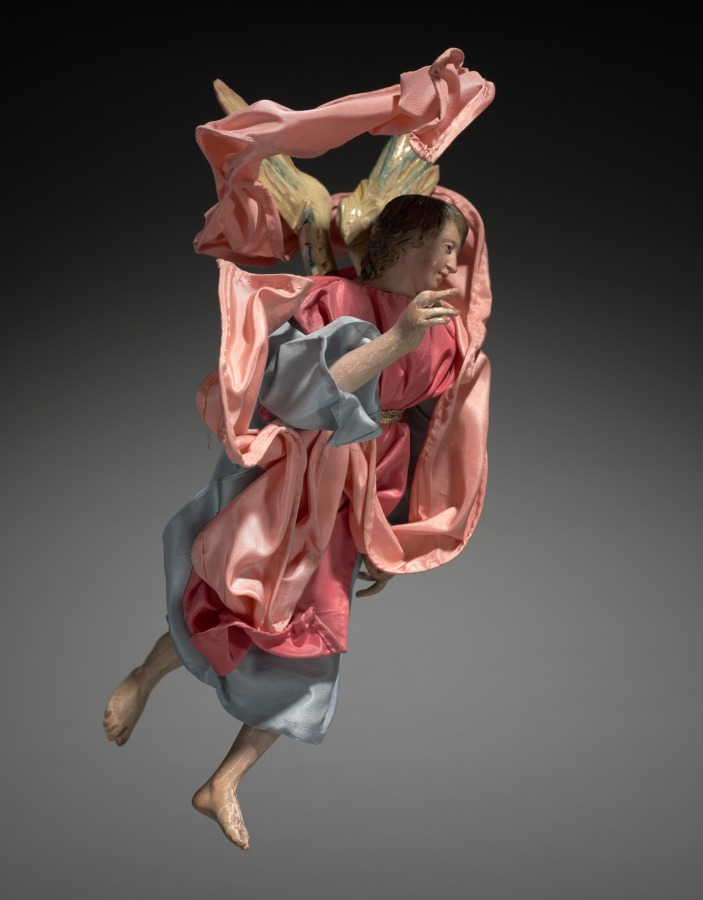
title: Figure from a Crèche: Angel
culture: Italy, Naples, late 18th-early 19th century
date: 1780–1830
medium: painted wood and terracotta with various textiles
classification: Sculpture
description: The practice of creating scenes of the Nativity for the home dates from the early 1700s in Italy, where people began to set up doll-like figures of about a foot or less in height. The custom was particularly popular in Naples around 1800, where crèche scenes (crèche means cradle, or crib) included many figures, whose heads and hands of painted terracotta, stuffed cloth bodies, and clothing adapted from contemporary local costumes gave them an amazingly realistic character. Representations of the birth of Jesus can be traced to the first few centuries of Christianity. Both living creatures and sculptural depictions of them were used from early times. By the late middle ages it was customary to create life-size figures of wood or stone, naturalistically painted, to represent the characters who participated in the events of Jesus's early life. These sculptures were then arranged in scenes illustrating one or both of the most important of these events, the Adoration of the Shepherds and the Adoration of the Magi-the three kings from the East who came to pay homage to the Christ child. Used in churches, these large figures were especially popular in Italy, Central Europe, Spain, and Portugal.